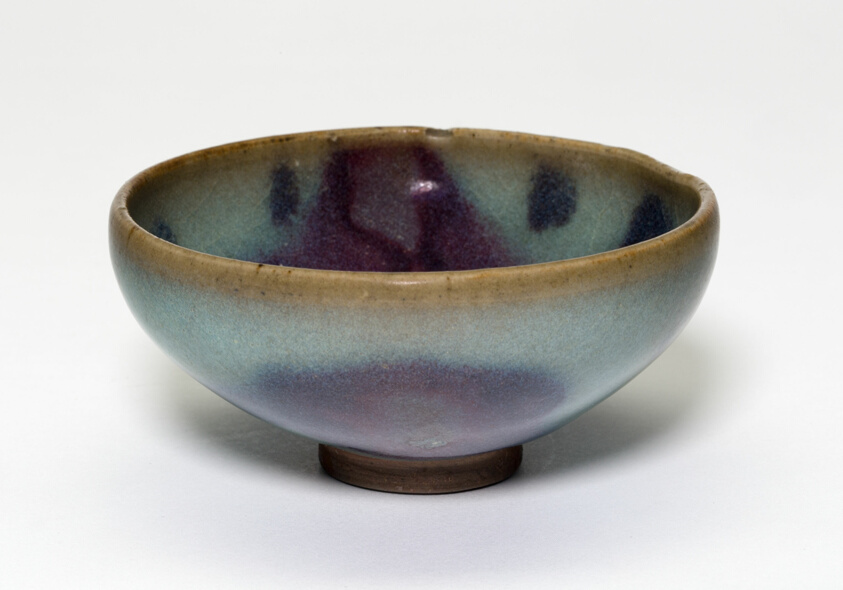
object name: Vessel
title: Bowl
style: Chinese (culture or style)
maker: China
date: Jin dynasty (1115–1234), 13th century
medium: Jun ware; stoneware with opaque pale-blue and crimson-splashed glazes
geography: China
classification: bowl; stoneware; dish (vessel); asian art; ceramics; vessel